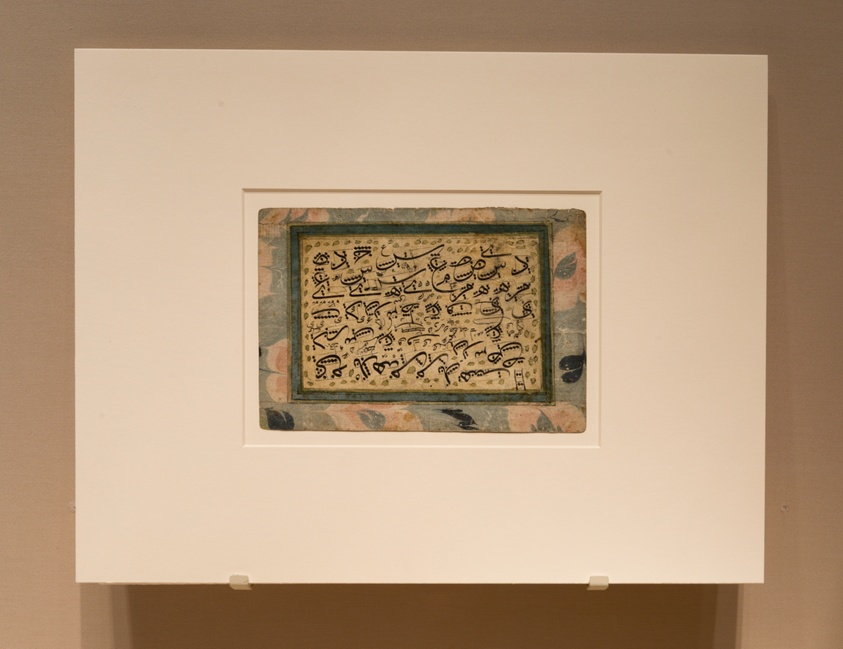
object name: Drawing and Watercolor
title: Calligraphic Exercise Showing Measurements of Individual Letters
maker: Turkey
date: 18th/19th century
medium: Ink and colors on paper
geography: Turkey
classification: calligraphy; painting; asian art